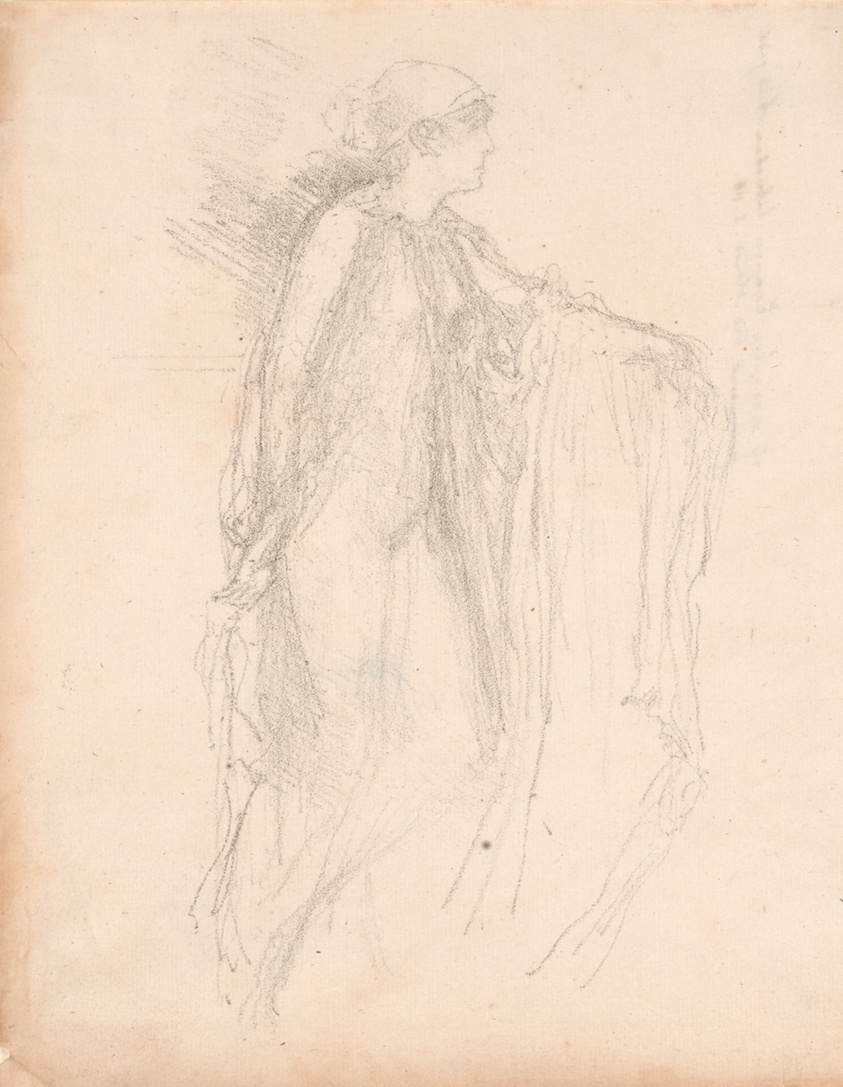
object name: Print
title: The Cap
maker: James McNeill Whistler (American, 1834-1903)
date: 1893, printed posthumously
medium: Lithograph, in black ink, on cream laid paper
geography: United States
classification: lithograph; print; prints and drawing; paper